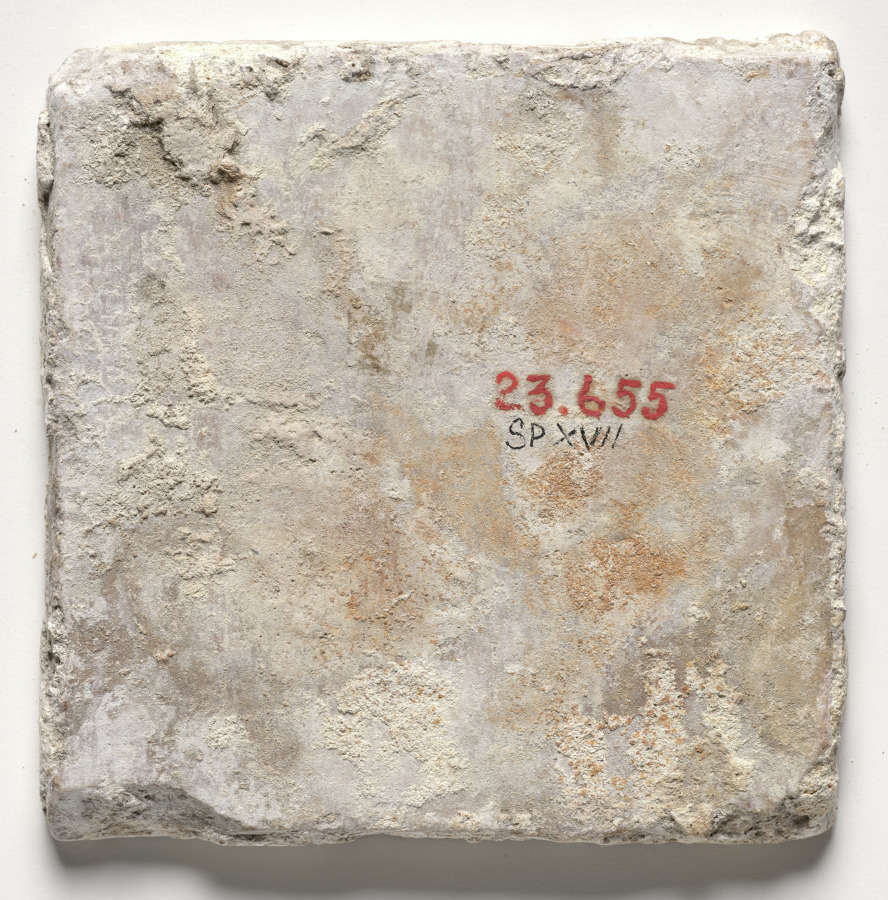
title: Wall Tile–Man with a Sword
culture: Spain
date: c. 1600s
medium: glazed ceramic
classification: Ceramic